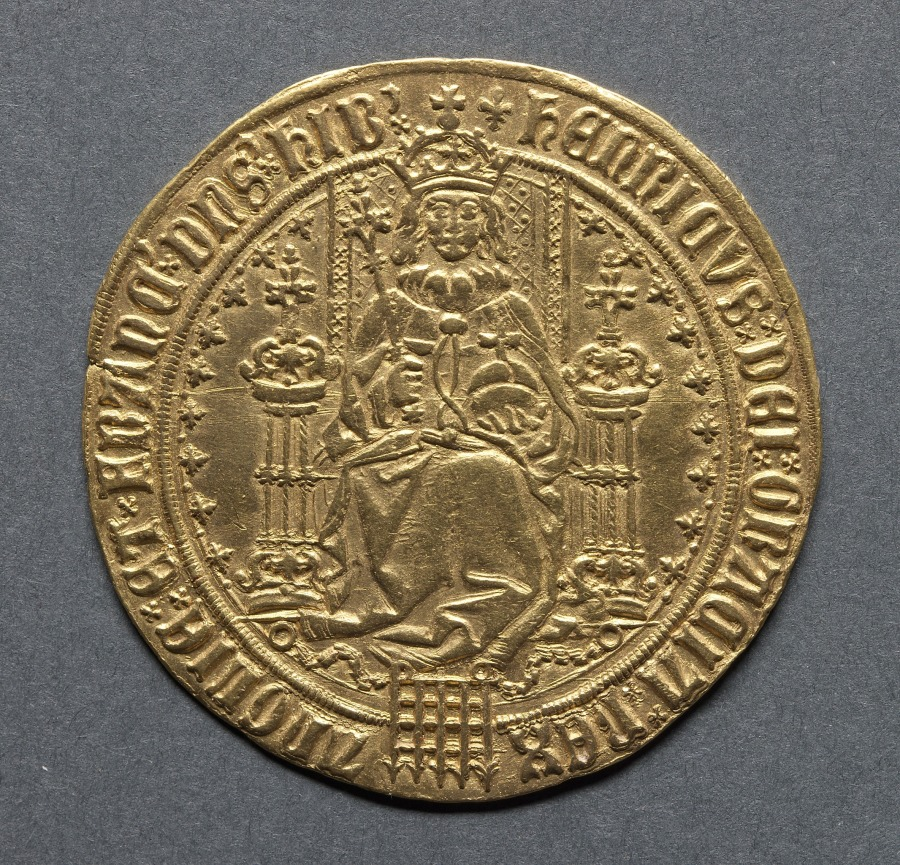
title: Sovereign: Henry VII (obverse); Shield of Arms in Tudor Rose (reverse)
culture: England, Henry VII, 1485-1509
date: 1504–9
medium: gold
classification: Coins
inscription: HENRICIUS DEI GRATIA, REX, ANGLIAE, FRANCIAE, ET HIBRNIA DNS HIB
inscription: IHESUS AVTEM TRANSIENS PER MEDIUM ILLORVM IBAT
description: The coinage of Henry VII is the first step from medieval to modern coinage. In 1489 a special commission was issued for the striking of a new gold coin called the sovereign, weighing 240 gs. This is the first use of the name in the English series. These early sovereigns can boast of an artistic achievement never before realized on an English coin, and perhaps never since.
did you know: Sovereigns are large, thin gold coins that feature portraits of the respective monarch; here Henry VII is sitting on a throne.